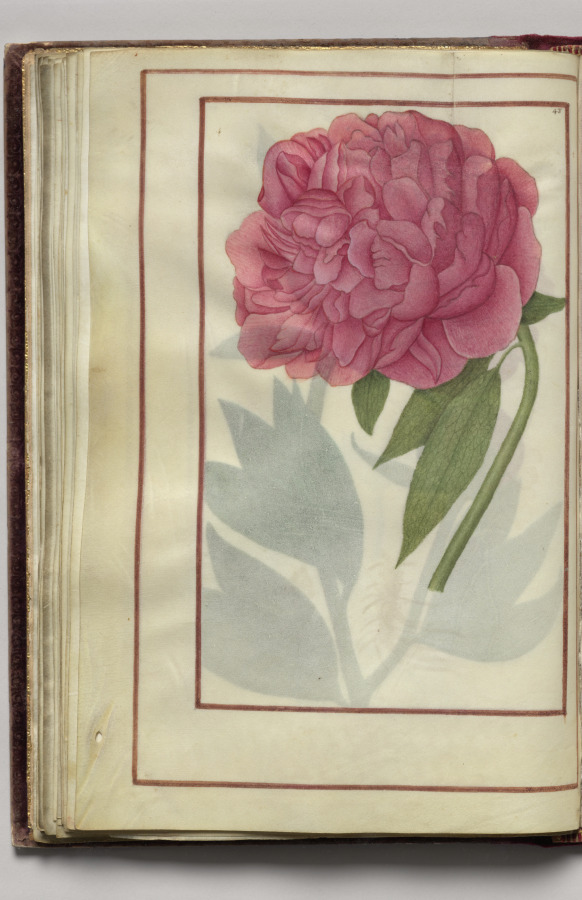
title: Pink Peony, folio 24 (verso), from Florilegium (A Book of Flower Studies)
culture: France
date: 1608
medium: watercolor, ink, silver, and gold over occasional traces of pencil, on vellum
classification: Bound Volume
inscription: Dated: Poitiers 1608 (on frontispiece) Signed: On frontispiece in black ink, lower right: Van Kuyk Notation on drawing: Frontispiece: in pencil, lower margin: * élève de Van Kessel, peintre flammand (* in pencil also appears in front of Van Kuyk's name).